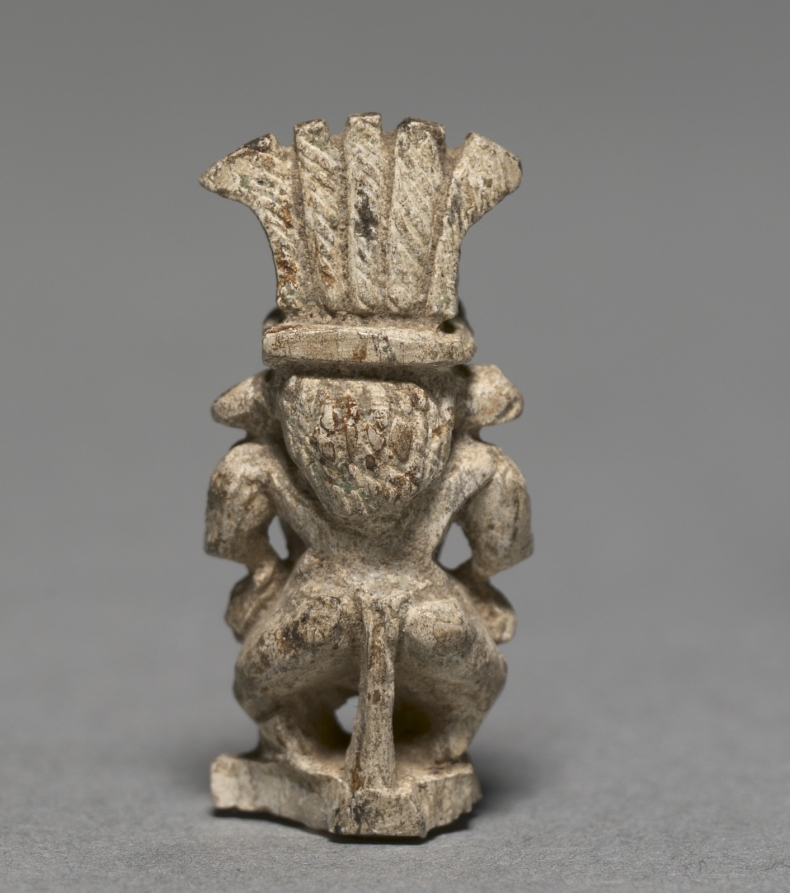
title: Amulet of Bes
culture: Egypt, Late period (715–332 BCE), Dynasty 27–Second Persian period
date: 525–332 BCE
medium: gray steatite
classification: Amulets